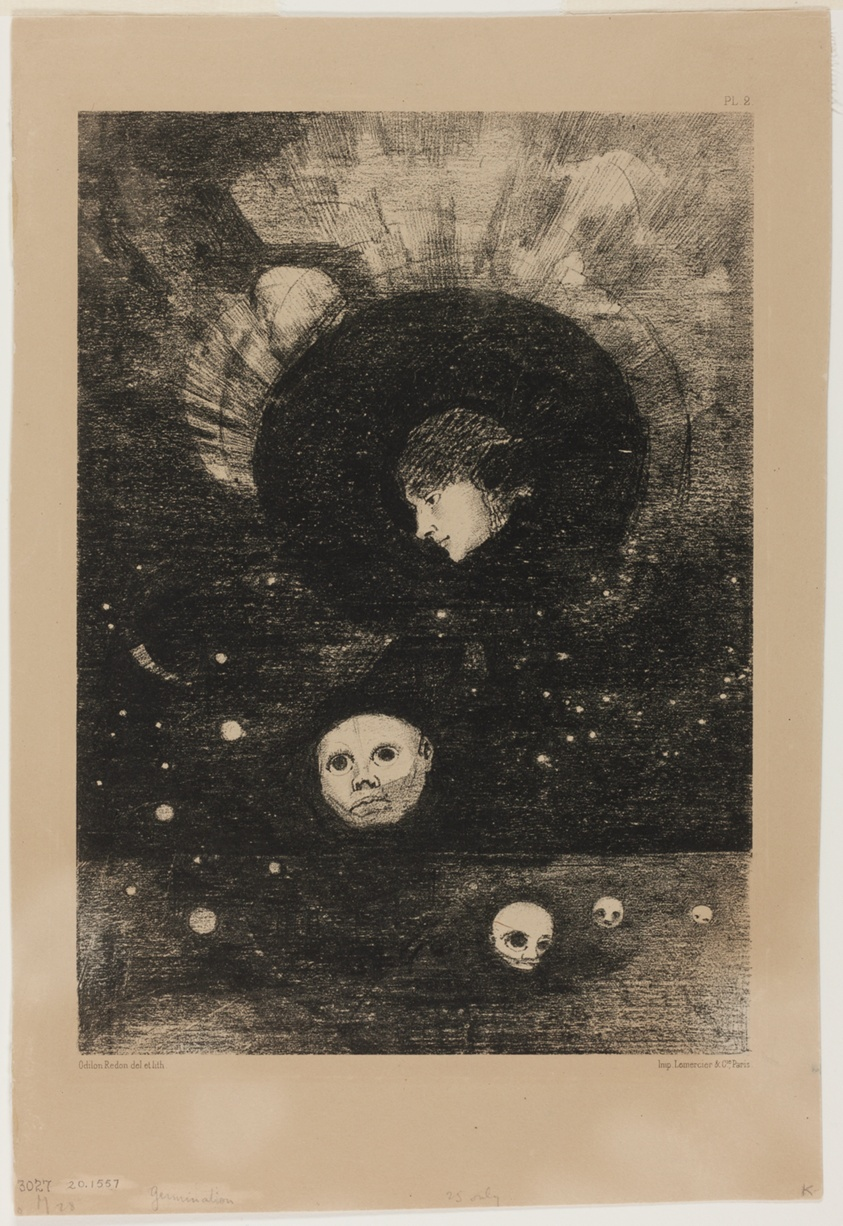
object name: Print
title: Germination, plate two from In Dreams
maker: Odilon Redon (French, 1840-1916)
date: 1879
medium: Lithograph on tan wove paper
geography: France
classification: lithograph; print; prints and drawing; paper